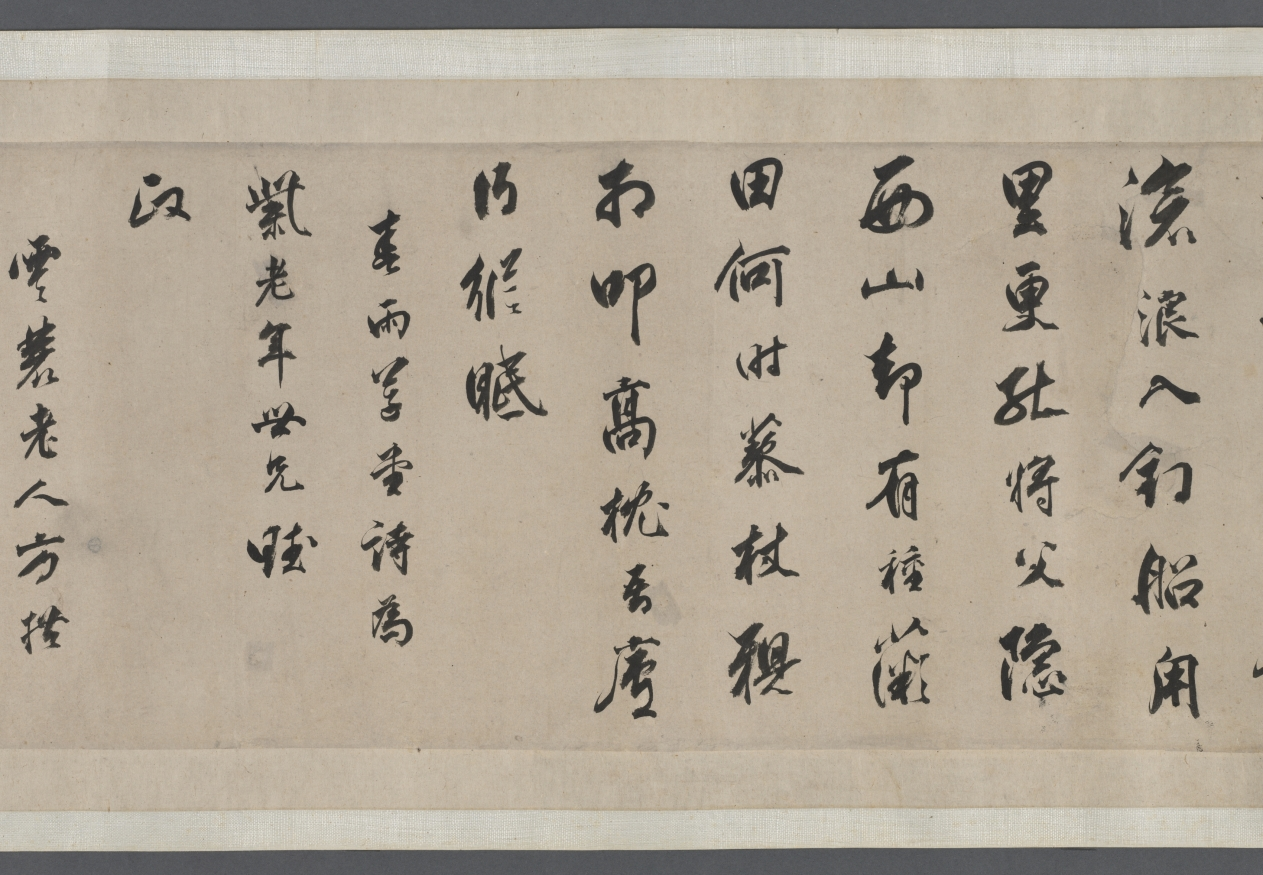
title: Spring Rain Thatched Hut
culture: China, Qing dynasty (1644-1911)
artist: Wang Jianzhang (Chinese, active 1621–1662)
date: 1650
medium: handscroll, ink on paper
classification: Drawing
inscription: Title by Wu Zhiying 吳芝瑛 (1868–1933), dated 1910.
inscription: 春雨草堂圖。庚寅仲春，為紫玄社兄畫於若耶溪上。 仲初王建章。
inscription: 12 colophons by Gong Weiliu’s 宮偉鏐 (1611–1680) contemporaries: Fang Gongqian 方拱乾 (1596–1667, jinshi of 1628); Jiang Cai 姜埰 (1607–1673); Liang Yizhang 梁以樟 (1608–1665); Du Shaokai 杜紹凱 (also named Du Jie 杜岕, 1617–after 1689), dated 1648; Zhao Kaixin 趙開心 (d. 1663), dated 1647; Zhao Erbian 趙而忭 (d. 1658); Yu Yaoguang 余耀光, dated 1649; Yao Quan 姚佺, dated 1648; Chen Taisun 陳台孫 (b. 1611, jinshi of 1640); (Monk) Shao 韶; Du Zhujin 杜祝進; and Tang Shi 唐時.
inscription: 此研田莊居士王建章為先太史紫元公所作春雨草堂圖也。居士字仲初，明崇禎間人，與先太史及惲香山相友善。喜畫佛像，自謂不讓李公麟。山水祖述董源，筆力雄健，有不可羈勒之概。香山稱其墨有五采，非世人所知。然性廉重，非同志不輕落筆，人得其寸圖尺縑，必相與忻賞，如獲蜼彝兕敦，非人世間物也！見先太史筆記，此圖寫雨景，而氣韻生動，勃勃於不能止。每一展覽，覺滿紙雲烟，墨瀋猶濕，如寫吾先人胸中未盡之邱壑也。圖後題詠，多一時名手，想見文采風流之盛。迄今二百餘年，舊德先疇，遺風未沫。吾子孫其永寶之，如與吾先人接謦咳於一堂，為感思之助，其敢作圖畫觀乎！同時香山亦有圖佚去己久，不知異日能為延津之合否。壬申長夏本昂重裝敬識。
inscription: Collectors' seals including: Gong Ben'ang 宮本昂 (1821–1874); Lian Qian 廉泉 (1868–1932); Wu Zhiying 吳芝瑛 (1868–1933)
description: With its striking simplicity, this painting captures the pure serenity of a private garden in the moist atmosphere of a spring morning on a small river. Painted in the style of Ni Zan, Wang Jianzhang dedicated this work to his patron-friend Gong Weiliu (1611-1680). Gong retired from government service after the fall of the Ming dynasty and constructed a garden-retreat at his native home in Taizhou, Jiangsu province. He invited scholars and poets from his literary society to contribute writings of his estate, which are here mounted together with the painting in this scroll.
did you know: Gong Weiliu, the owner of the estate portrayed here, had received his prestigious jinshi degree in 1643, but his official career was thwarted by the collapse of the Ming dynasty the following year.